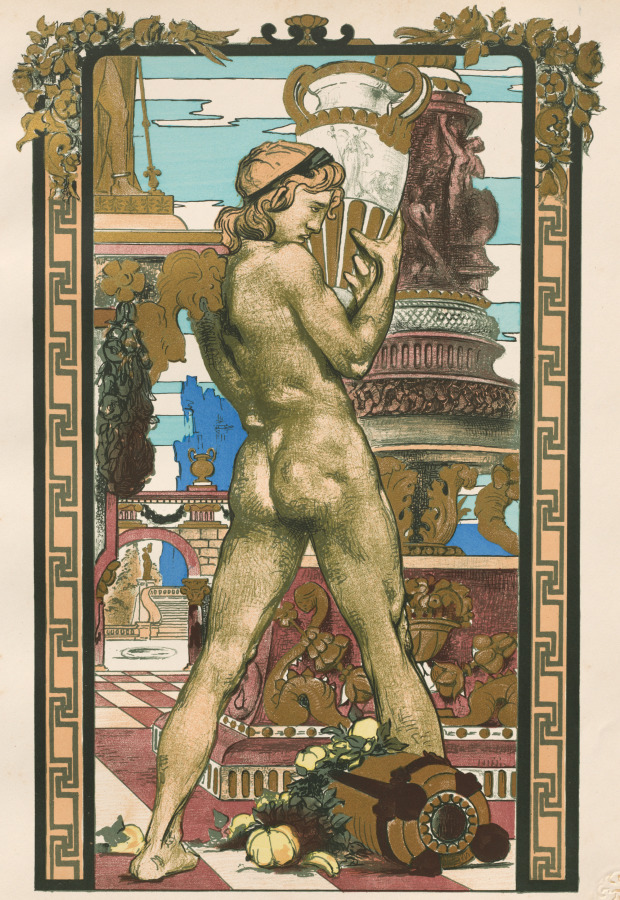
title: Porteur d'Amphore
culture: France, Paris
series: L'Estampe Moderne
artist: Maurice Desvallières (French, 1857–1926)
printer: Imprimerie Champenois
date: 1899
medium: Color lithograph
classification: Bound Volume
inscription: lower right corner of sheet: blindstamp of l'Estampe Moderne (Lugt 2790)